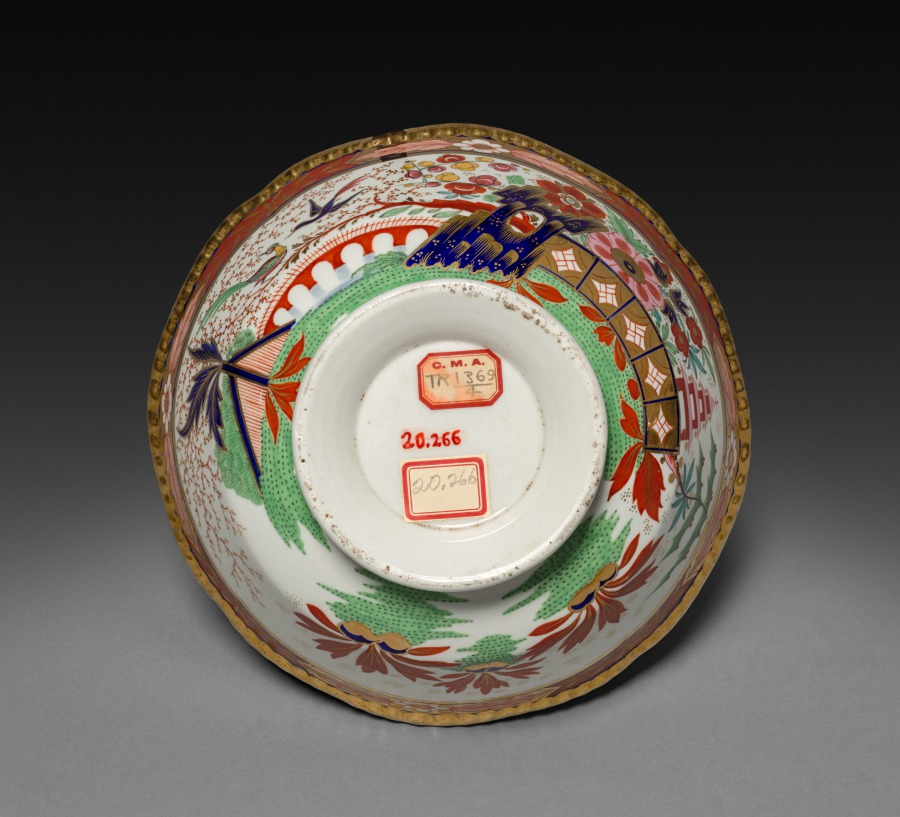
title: Bowl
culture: England, Derby, late 18th Century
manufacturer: Derby (Crown Derby Period) (British)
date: late 1700s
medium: porcelain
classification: Ceramic